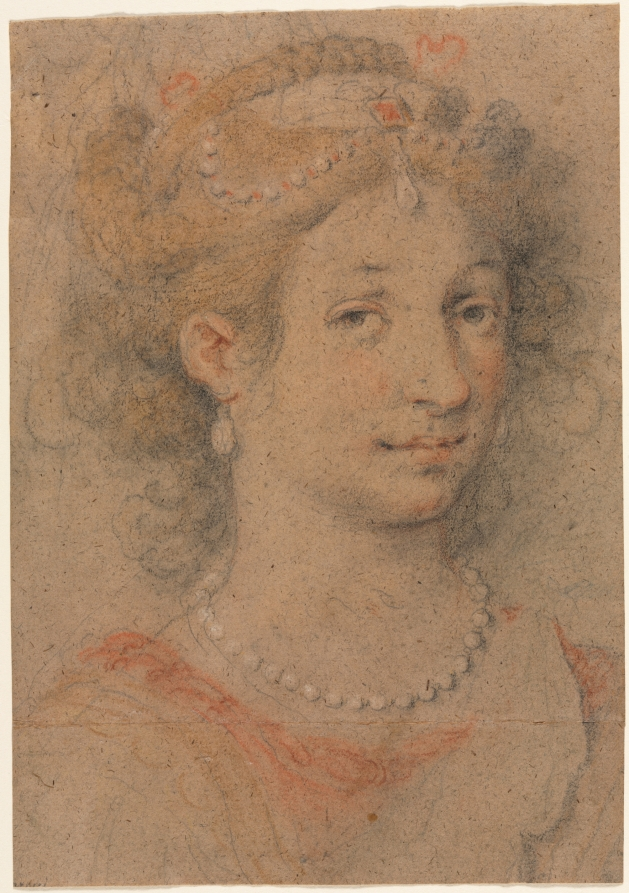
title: Head of a Woman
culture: France, 17th century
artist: Anonymous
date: 1600s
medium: black and red chalk over graphite, heightened with white chalk (with additions? in yellow and orange pastel?)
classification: Drawing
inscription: Inscription on back of frame (now removed and lost?): Mme. Bouchaud Soupique "a Flemish Bellange" but most likely by Claude Vignon (SEL) [according to departmental catalog sheet]